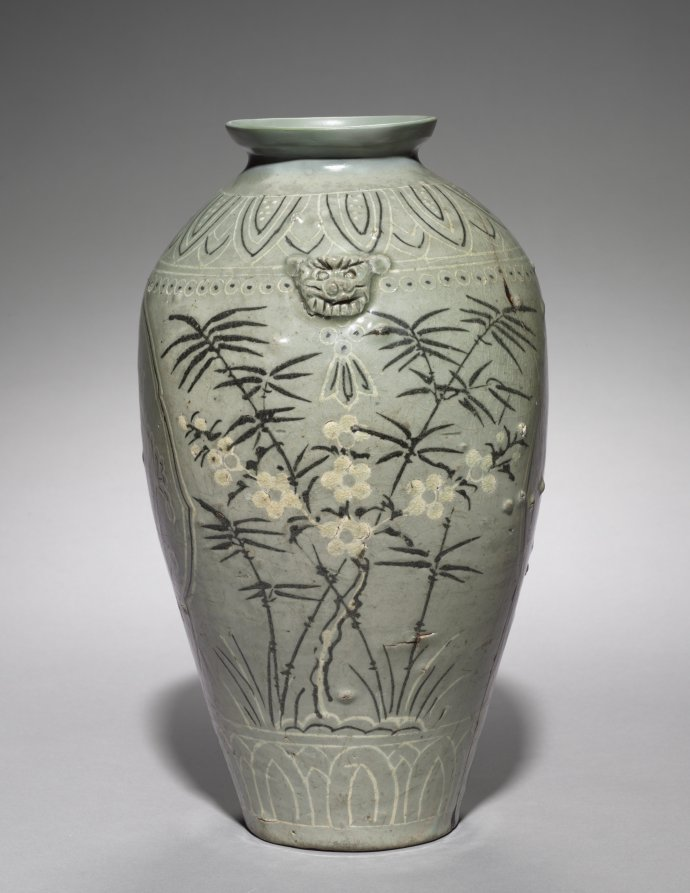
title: Vase with Inlaid Lotus, Plum, and Bamboo Design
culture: Korea, Goryeo dynasty (918–1392)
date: 1300s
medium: celadon with inlaid design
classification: Ceramic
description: Flattened-shaped jars like this one started to appear around the late 1200s. Each of the flattened sides is decorated with an image of a lotus flower pond, enclosed in a lobed panel. The protruding sides, on the other hand, depict an image of bamboo trees and plum blossoms. This particular example seems to have been produced in the late 1300s, when the overall quality of techniques involved in making celadon works sharply deteriorated. In contrast to translucent greenish blue celadon works of the 1100s, this flask has a gray greenish glaze due to less refined clay. Furthermore, its rather roughly executed inlaid design shows a clear sign of decline in craftsmanship. Nevertheless, less attention to technical details gave way to a freer style pottery called buncheong in the succeeding centuries.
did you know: The decor that adorns this flask was done in the inlay technique, a method that fills engraved designs with either white or black soil.